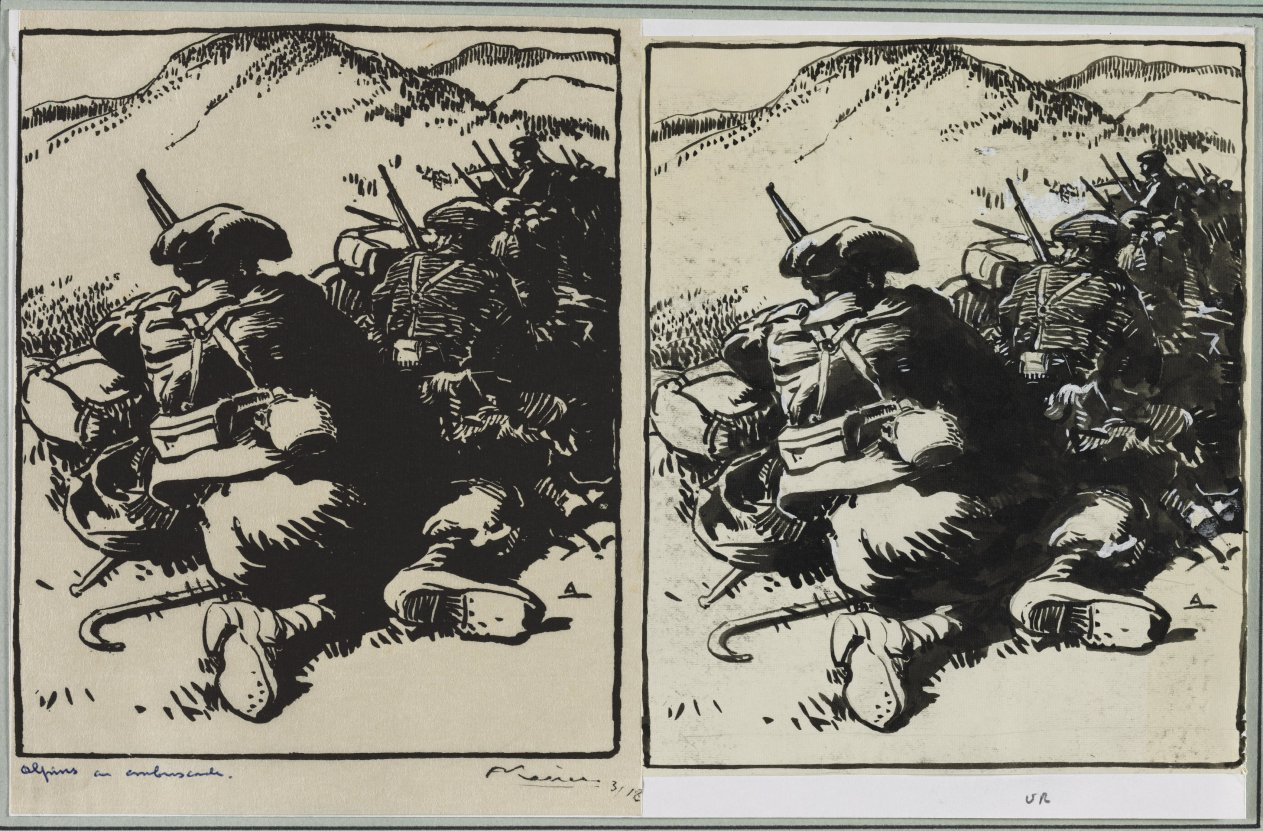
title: Alpins en ambuscade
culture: France, 20th century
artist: Auguste Louis Lepère (French, 1849–1918)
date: 1914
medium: brush and black ink over pencil with white highlights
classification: Drawing